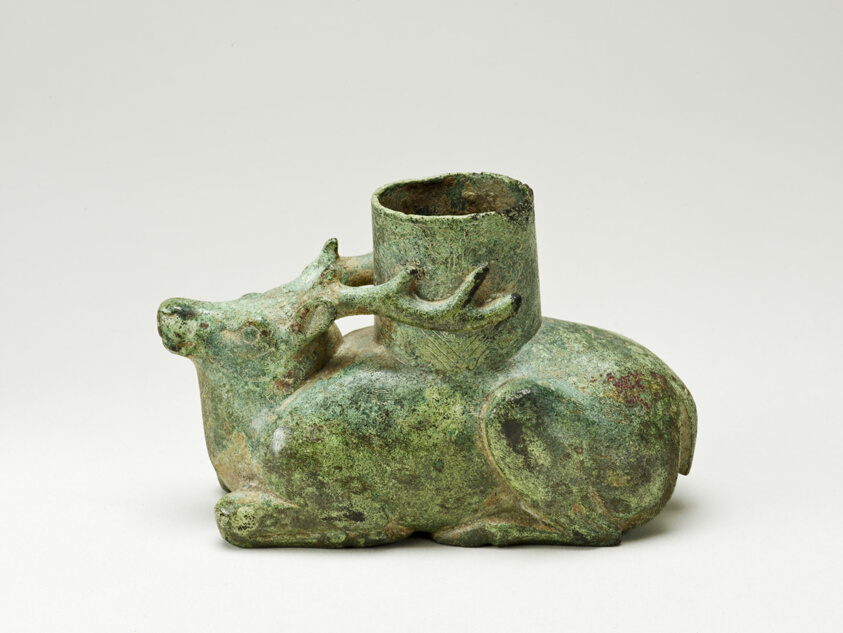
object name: Metalwork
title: Recumbent Stag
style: Chinese (culture or style)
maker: China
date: Western Han dynasty (206 B.C.–A.D. 9)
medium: Bronze with incised decoration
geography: China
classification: bronze; metal; decorative object/ornament; asian art; metalwork